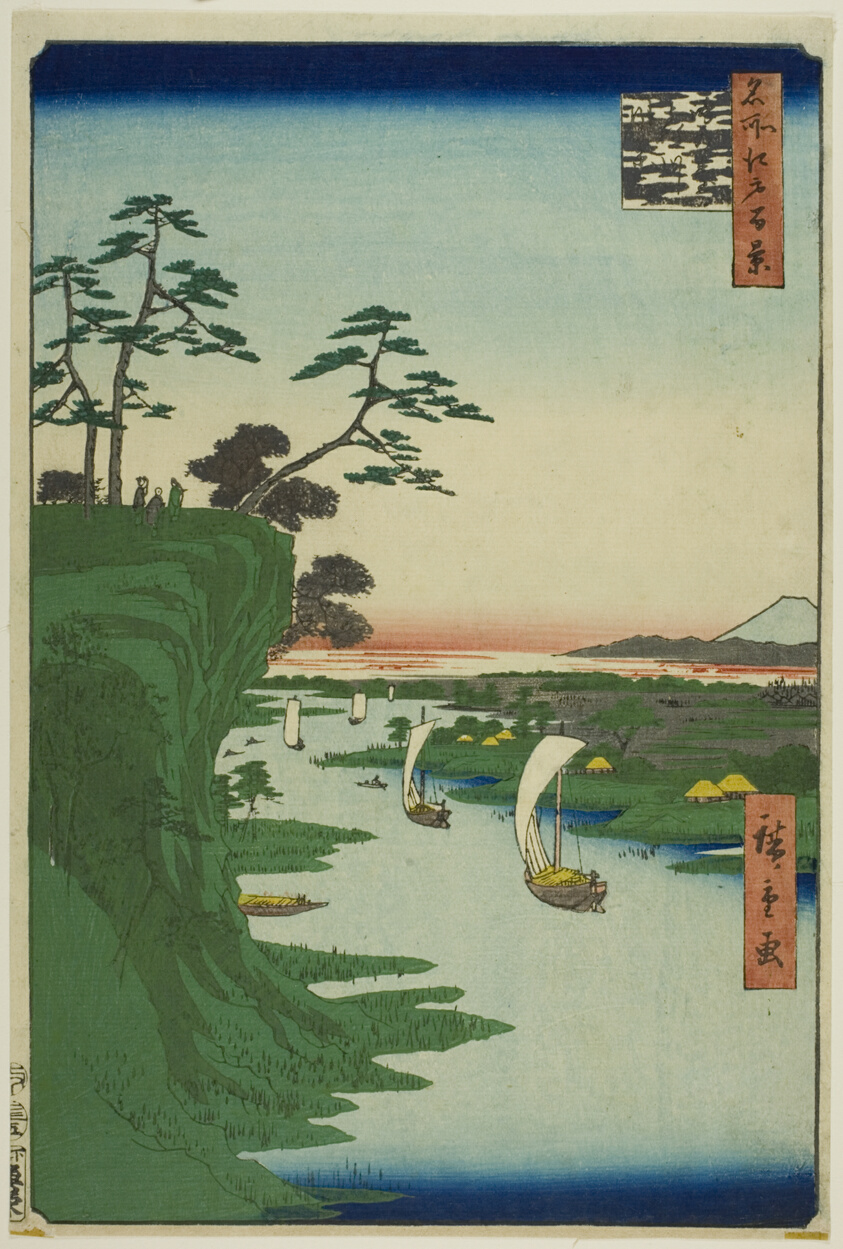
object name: Print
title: View of Konodai and the Tone River (Konodai Tonegawa fukei), from the series "One Hundred Famous Views of Edo (Meisho Edo hyakkei)"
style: Japanese (culture or style)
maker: Utagawa Hiroshige 歌川 広重; Japanese, 1797–1858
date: 1856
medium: Color woodblock print; oban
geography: Japan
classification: woodblock print; print